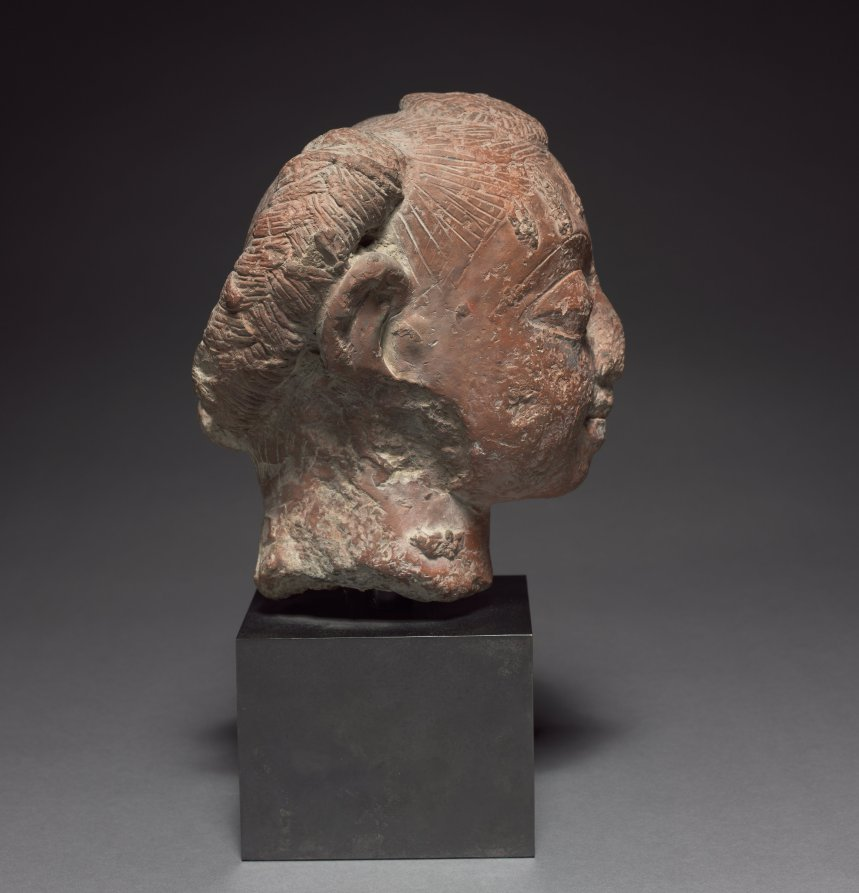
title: Female Head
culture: India, Gangetic plain region, Gupta period, 5th-6th centuries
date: 400s–500s CE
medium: terracotta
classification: Stone